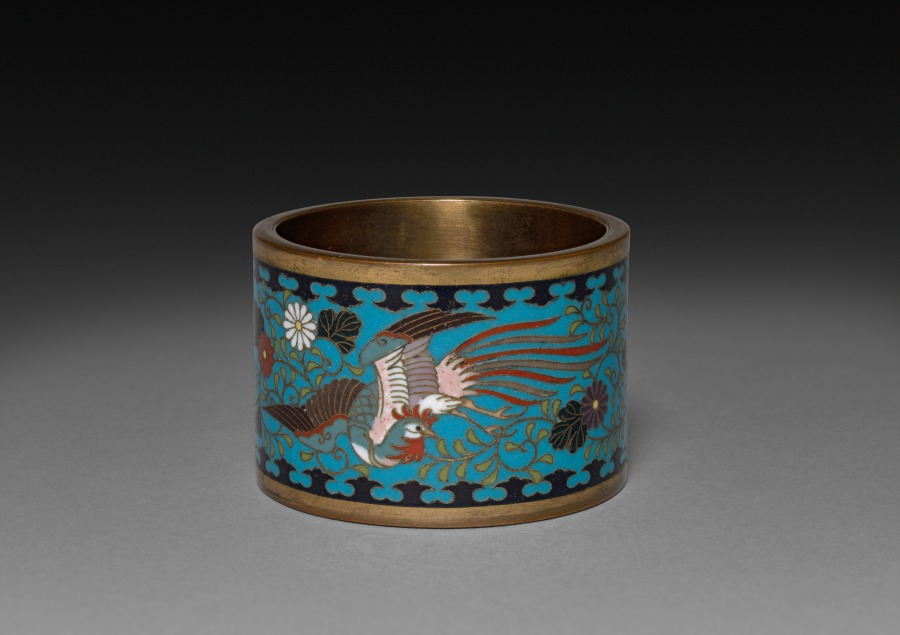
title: Napkin Ring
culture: Japan, Meiji period (1868–1912) to Taishō period (1912–26)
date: early 1900s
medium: one of a pair; cloisonne enamel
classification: Enamel